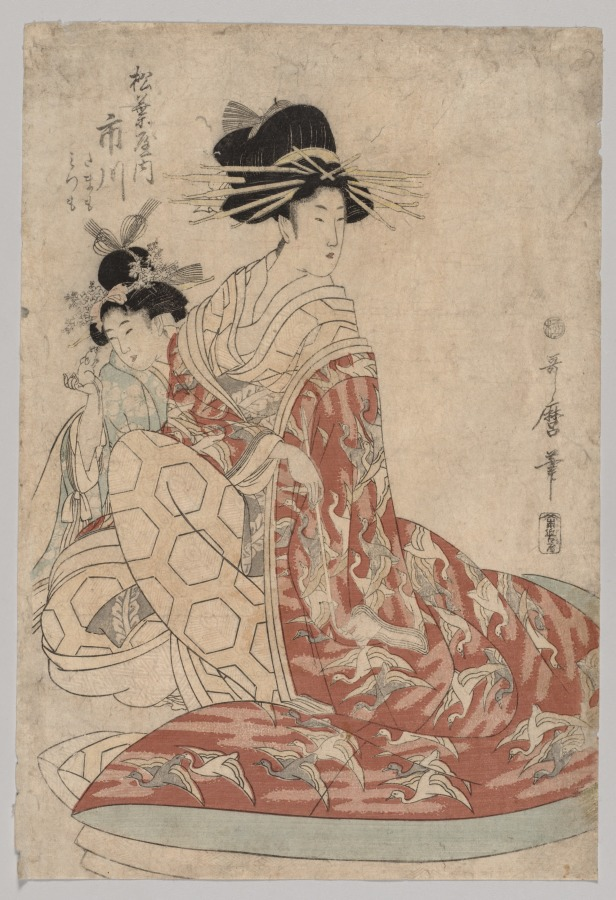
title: Ichikawa of Matsubaya with Minomo and Tamamo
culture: Japan, Edo period (1615–1868)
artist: Kitagawa Utamaro (Japanese, c. 1754–1806)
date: 1753–1806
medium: color woodblock print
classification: Print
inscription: Signature: Utamaro fude Publisher Seal: Omi-ya